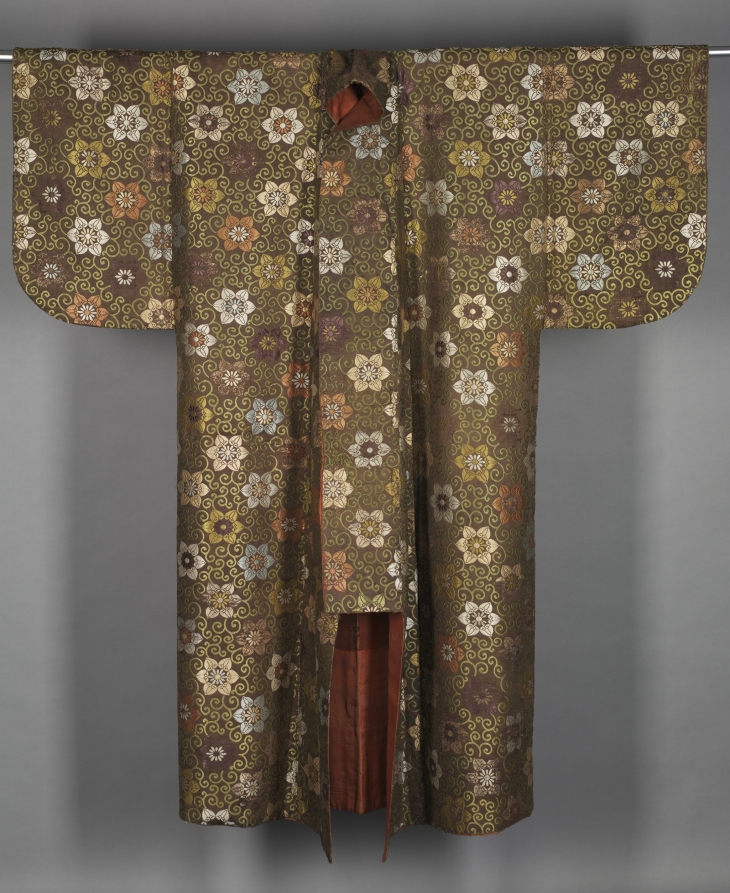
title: Noh Robe (Karaori)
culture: Japan, Edo period (1615–1868)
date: 1800–1850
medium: silk, twill weave with supplementary weft, brocaded; metal thread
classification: Garment